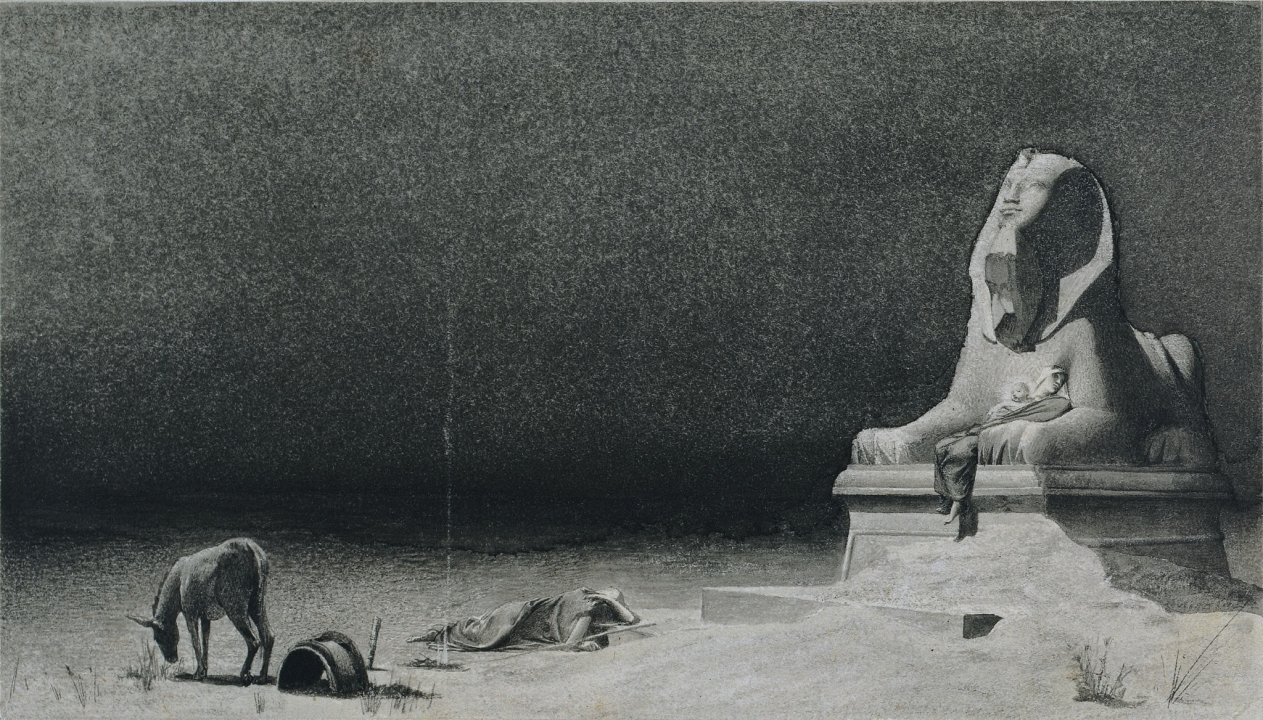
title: The Rest on the Flight into Egypt (recto)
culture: France, 19th century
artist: Luc-Olivier Merson (French, 1846–1920)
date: c. 1879–80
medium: gray and graphite wash, with scraping and traces of black chalk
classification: Drawing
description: This drawing relates to Luc-Olivier Merson's Rest on the Flight into Egypt, among the most popular paintings exhibited at the 1879 Paris Salon. This dream-like, highly unusual image from the familiar bible story shows Mary and Christ resting peacefully in the arms of a Sphinx, while Joseph sleeps near their dwindling fire. In the wake of its extraordinary success, Merson made several painted replicas of the work. Here, the composition is identical, but reversed, suggesting that it may have been an alternative version of the canvas.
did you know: It is possible that this drawing served as a model for a print, but the best-known printed reproduction of the painting differs from the sheet in several minor details.